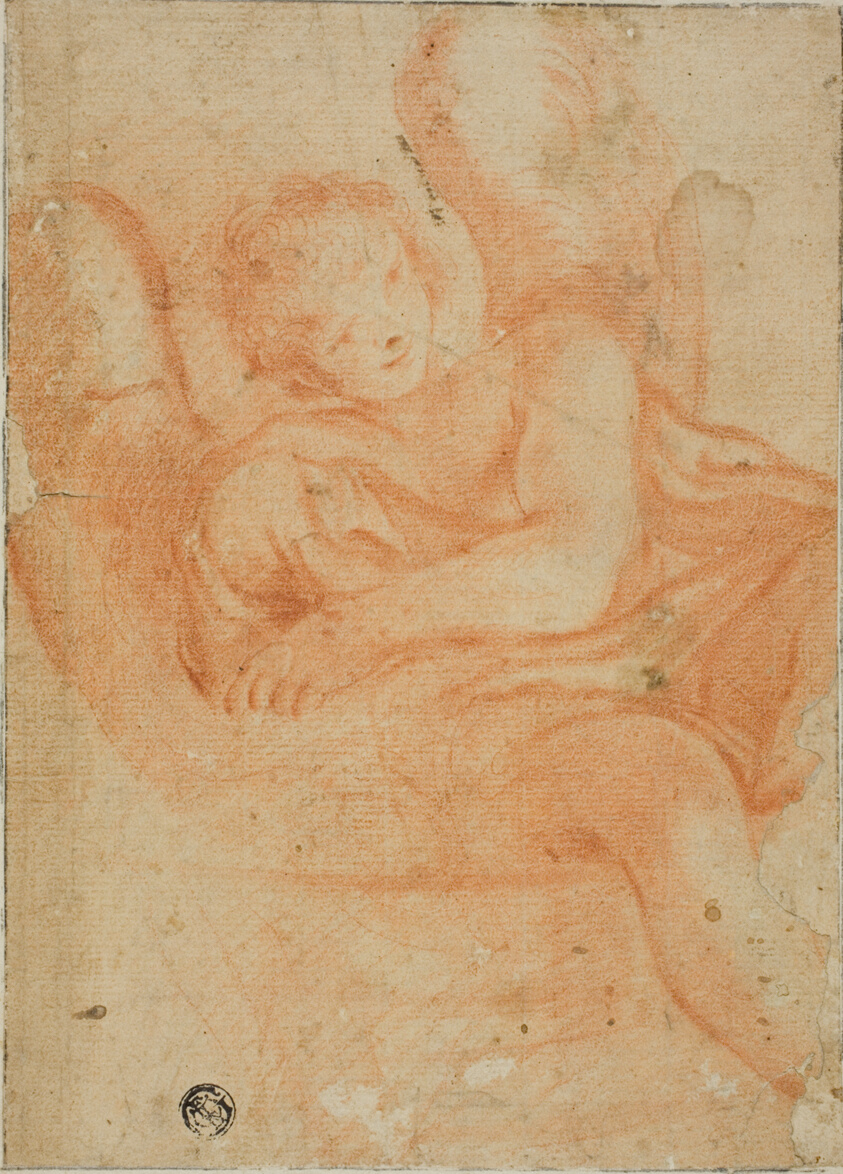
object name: Drawing and Watercolor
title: Seated Angel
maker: Unknown Artist; Italian, 17th/18th century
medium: Red chalk, on tan laid paper, laid down on ivory laid paper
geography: Italy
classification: chalk; drawings (visual works); prints and drawing